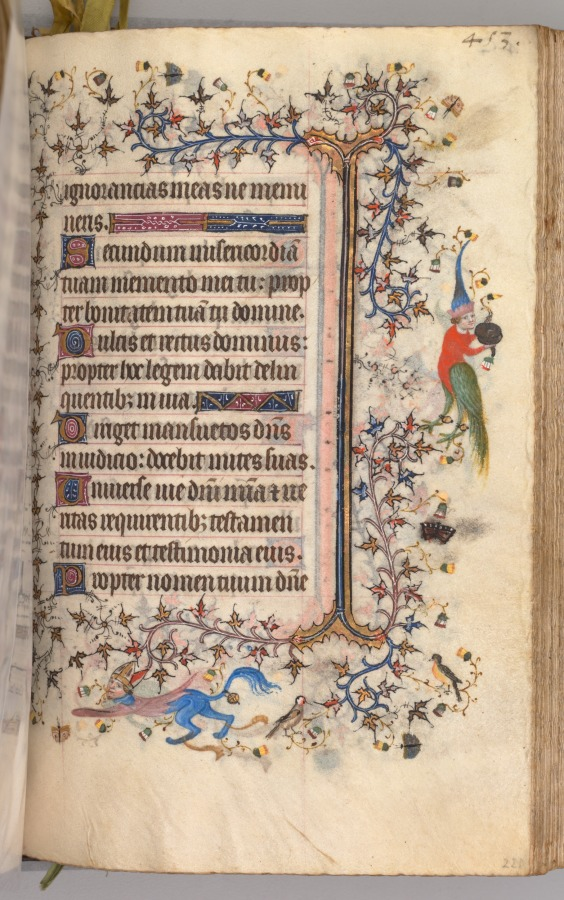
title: Hours of Charles the Noble, King of Navarre (1361-1425): fol. 221r, Text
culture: France, Paris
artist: Master of the Brussels Initials and Associates (French)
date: c. 1405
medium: ink, tempera, and gold on vellum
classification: Bound Volume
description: This precious volume was obviously highly prized by its owner, the French-born King of Navarre, who had his coat of arms painted on no less than twenty folios. Rather than directly commissioning this manuscript from a specific workshop, it seems that Charles the Noble acquired his book of hours -- perhaps ready-made for the luxury market -- while on a trip to Paris in 1404-05. A collaborative effort, six painting styles are evidenced within the pages of this codex, those of two Italians, two Frenchmen, and two Netherlanders. The painter who was responsible for the planning and decoration of the book, and who produced seventeen of the large miniatures, was a Bolognese artist known as the Master of the Brussels Initials. His principal assistant, responsible for most of the borders, was a Florentine who signed his name "Zecho" da Firenze on folio 208 verso.